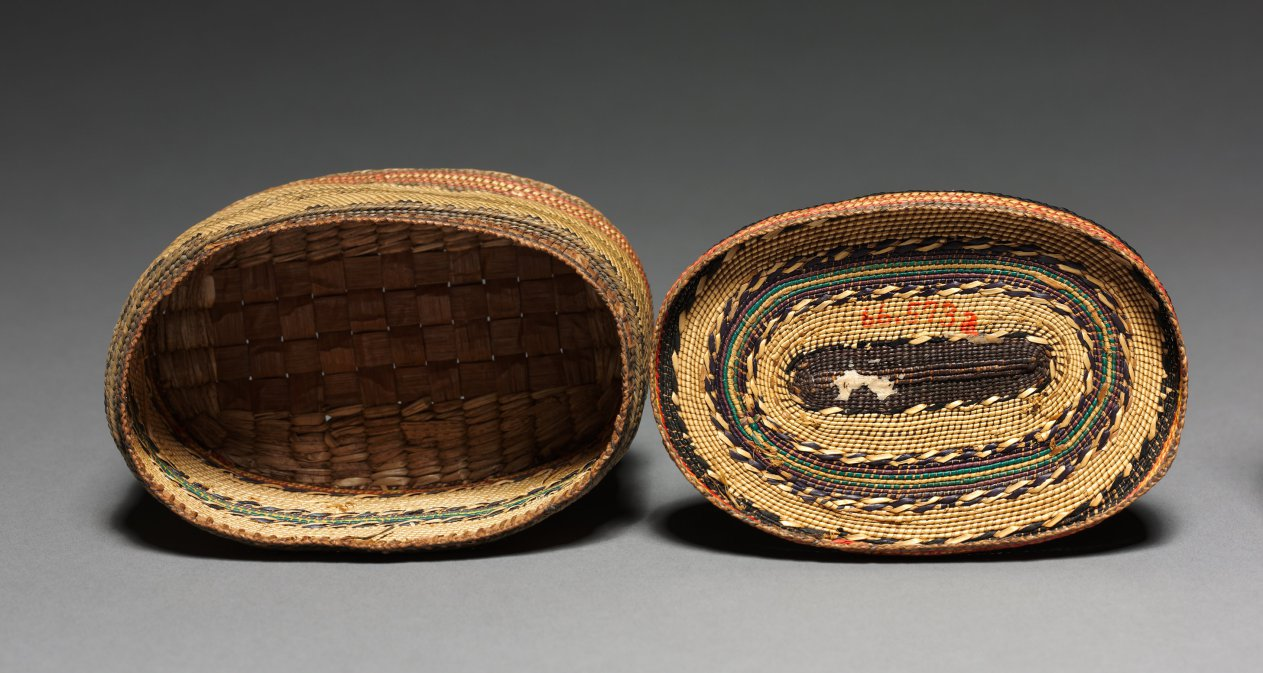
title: Lidded Bowl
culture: Northwest Coast, Vancouver Island, early 20th century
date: c 1900– 1925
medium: twined grass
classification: Basketry